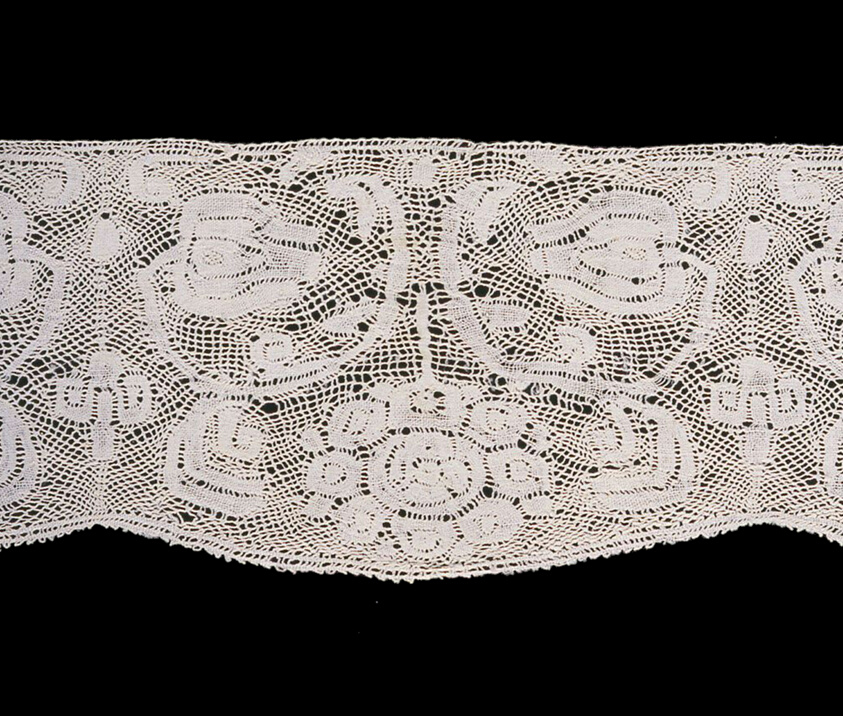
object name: Textile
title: Border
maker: Belgium, Flanders, Antwerp, for Dutch Peasant market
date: 1675/1700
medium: Linen, bobbin straight lace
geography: Antwerp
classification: textile; lace - bobbin; lace